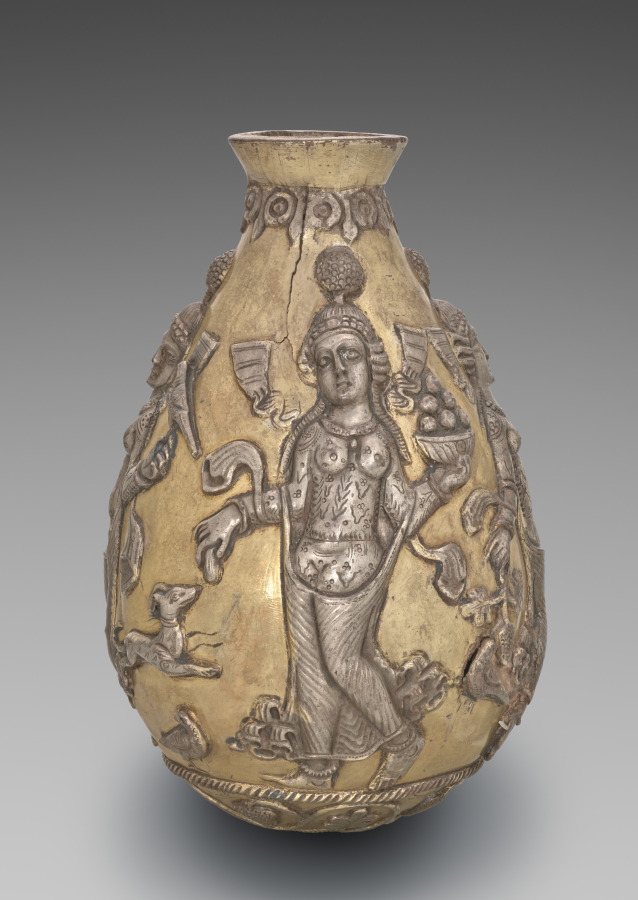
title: Anahita Vessel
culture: Iran, Sasanian Empire (224–651 CE)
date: 300–500 CE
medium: silver, cast, raised, repoussé, chased, and gilted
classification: Metalwork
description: These dancers may be sacred images of the Zoroastrian religion of the Sasanians or they may be bacchantes, followers of a cult of the Roman wine god, Bacchus, who was popular in the Near East.